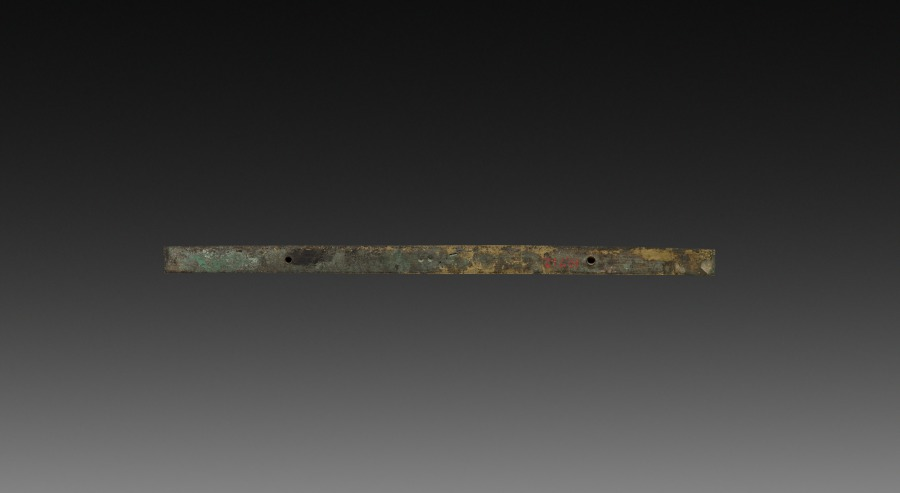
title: Ornamental Detail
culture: France, late 18th century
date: late 1700s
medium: gilt bronze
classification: Metalwork